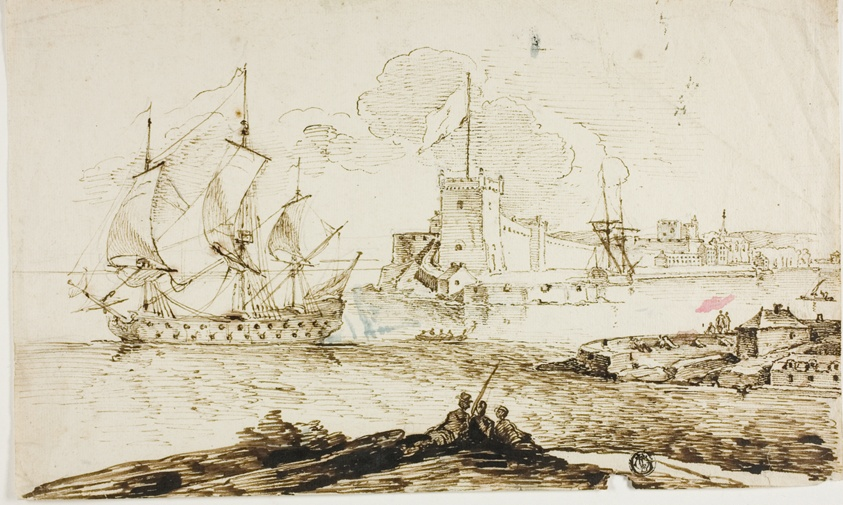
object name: Drawing and Watercolor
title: View of Harbor of Fortified Town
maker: Unknown Artist; European, n.d.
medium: Pen and brown ink, over graphite, on ivory laid paper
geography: Europe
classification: pen and ink drawings; drawings (visual works); prints and drawing